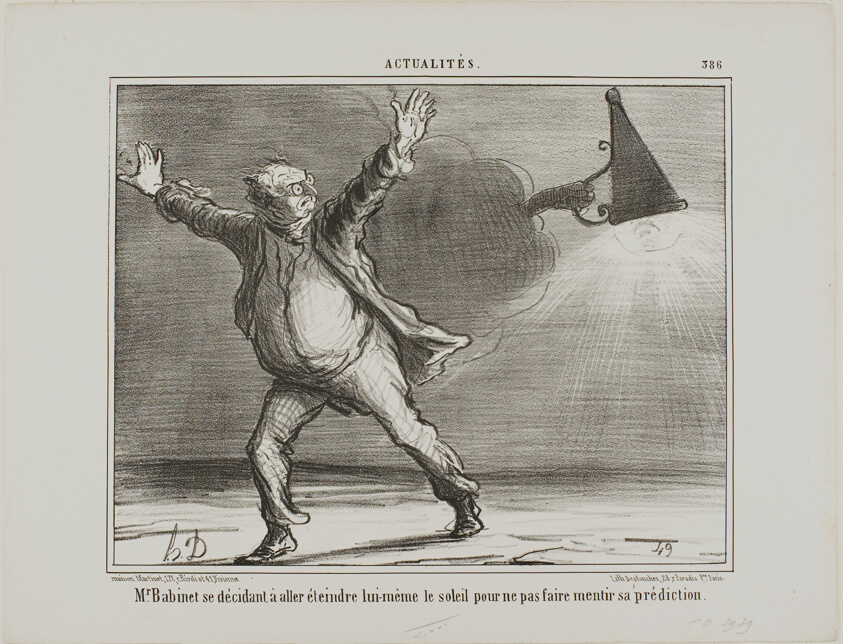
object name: Print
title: Monsieur Babinet decides to personally shut down the sun in order for his predictions to be fulfilled, plate 386 from Actualités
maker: Honoré Victorin Daumier; French, 1808-1879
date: 1857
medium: Lithograph in black on white wove paper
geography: France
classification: lithograph; print; prints and drawing